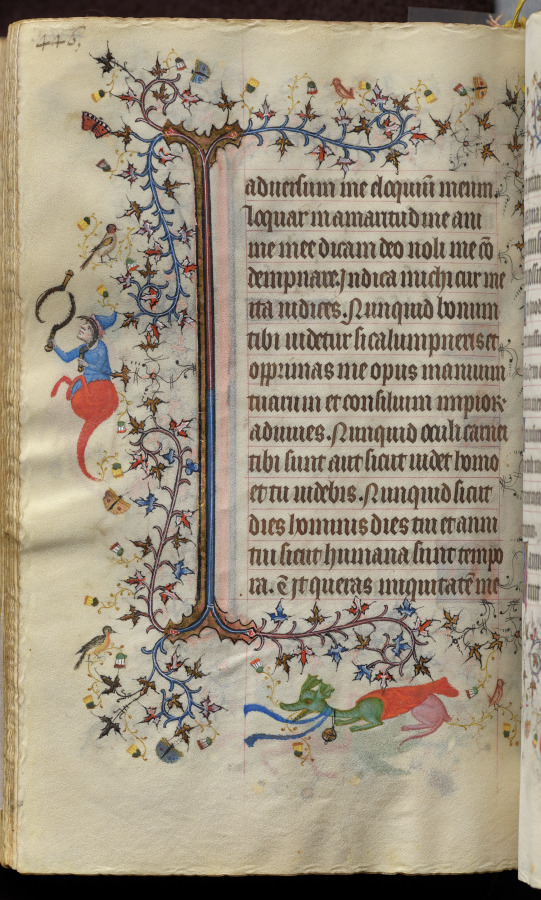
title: Hours of Charles the Noble, King of Navarre (1361-1425): fol. 217v, Text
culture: France, Paris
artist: Master of the Brussels Initials and Associates (French)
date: c. 1405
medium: ink, tempera, and gold on vellum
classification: Bound Volume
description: This precious volume was obviously highly prized by its owner, the French-born King of Navarre, who had his coat of arms painted on no less than twenty folios. Rather than directly commissioning this manuscript from a specific workshop, it seems that Charles the Noble acquired his book of hours -- perhaps ready-made for the luxury market -- while on a trip to Paris in 1404-05. A collaborative effort, six painting styles are evidenced within the pages of this codex, those of two Italians, two Frenchmen, and two Netherlanders. The painter who was responsible for the planning and decoration of the book, and who produced seventeen of the large miniatures, was a Bolognese artist known as the Master of the Brussels Initials. His principal assistant, responsible for most of the borders, was a Florentine who signed his name "Zecho" da Firenze on folio 208 verso.